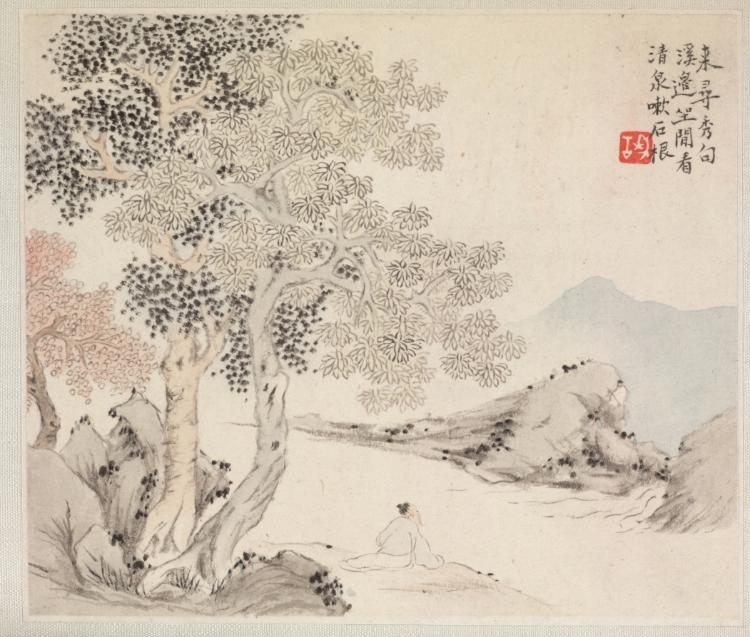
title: Album of Landscape Paintings Illustrating Old Poems: Three Big Trees, a Stream with an Old Man Sitting on the Bank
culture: China, Qing dynasty (1644-1911)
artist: Hua Yan (Chinese, 1682–c. 1765)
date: 1745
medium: album leaf, ink and light color on paper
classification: Painting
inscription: Coming and sitting down on the bank, I want to find some nice words for my poem. I watch the clear water washing the root of the stones. not signed, with a seal of the artist.